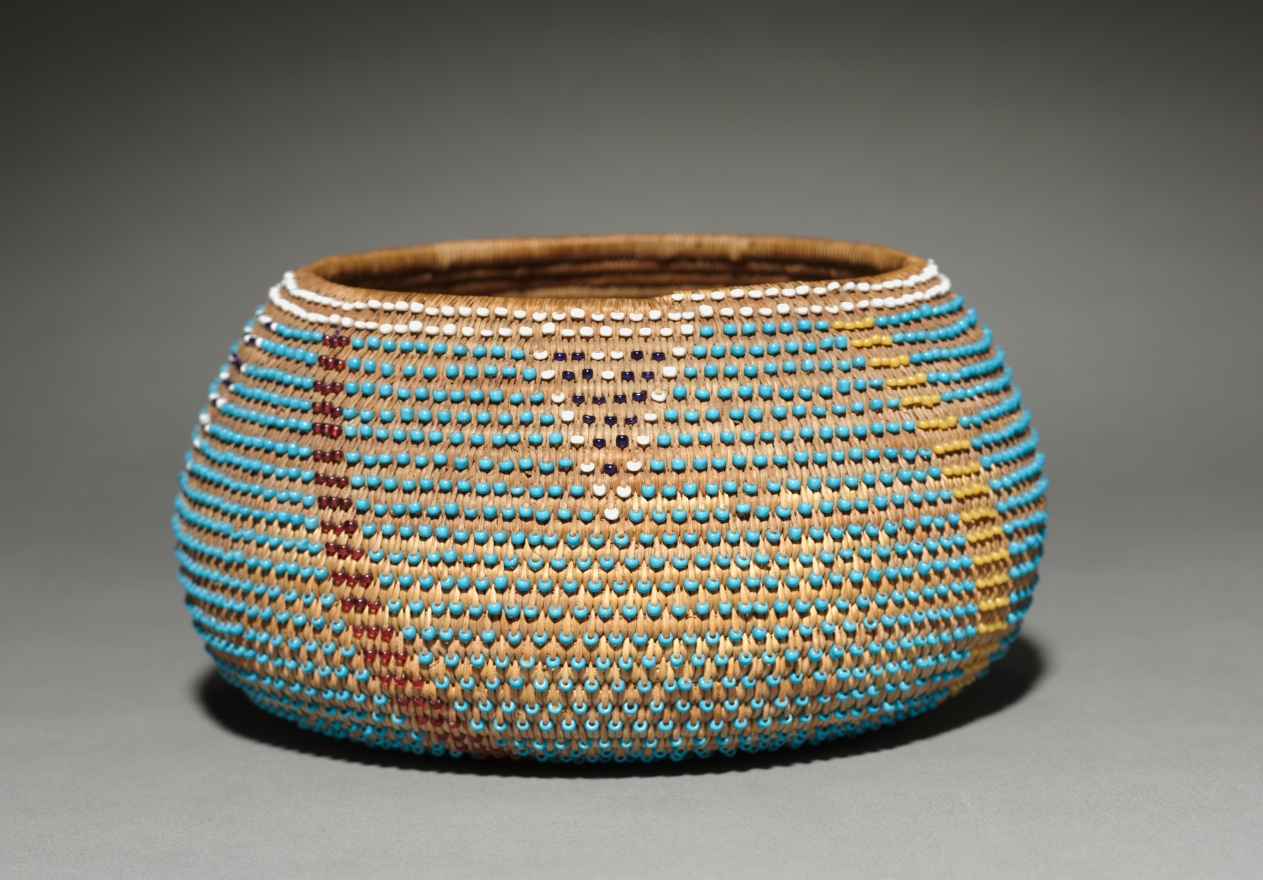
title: Gift Bowl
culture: California, Wappo, late 19th- early 20th century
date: c. 1890– 1905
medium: Sedge with beads; coiled ( 3 rods)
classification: Basketry